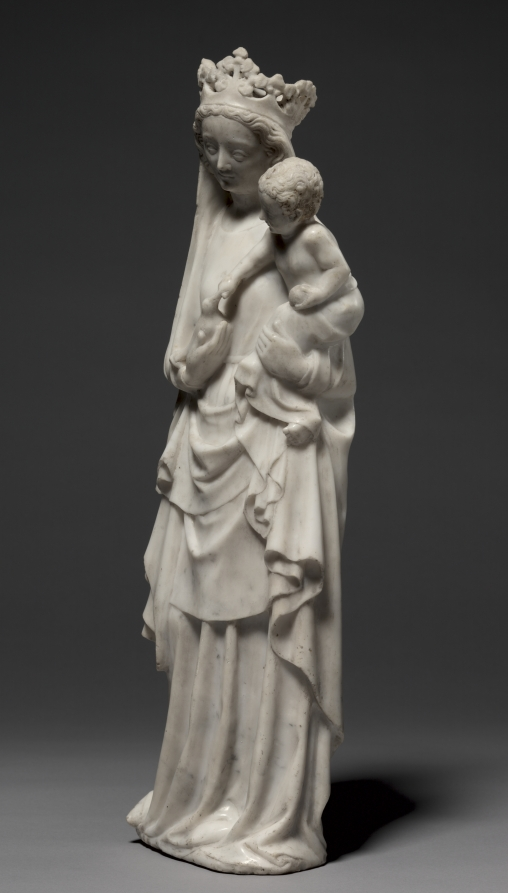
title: Virgin and Child with a Bird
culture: France, Île-de-France, Paris, 14th century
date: c. 1350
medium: marble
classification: Sculpture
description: The Virgin and Child represents one of the most frequent subjects for free-standing sculpture in 14th-century France, motivated by the developing cult of the Virgin and increasing veneration of Mary. Such sculptures were not restricted to churches, but were also found in roadside shrines, entrances to towns, and domestic use in private chapels. The small scale of this statuette suggests it was made for private veneration. The bird, held in the Virgin’s right hand, was a well-known symbol of the human soul and represents Christ’s role as redeemer of humankind.